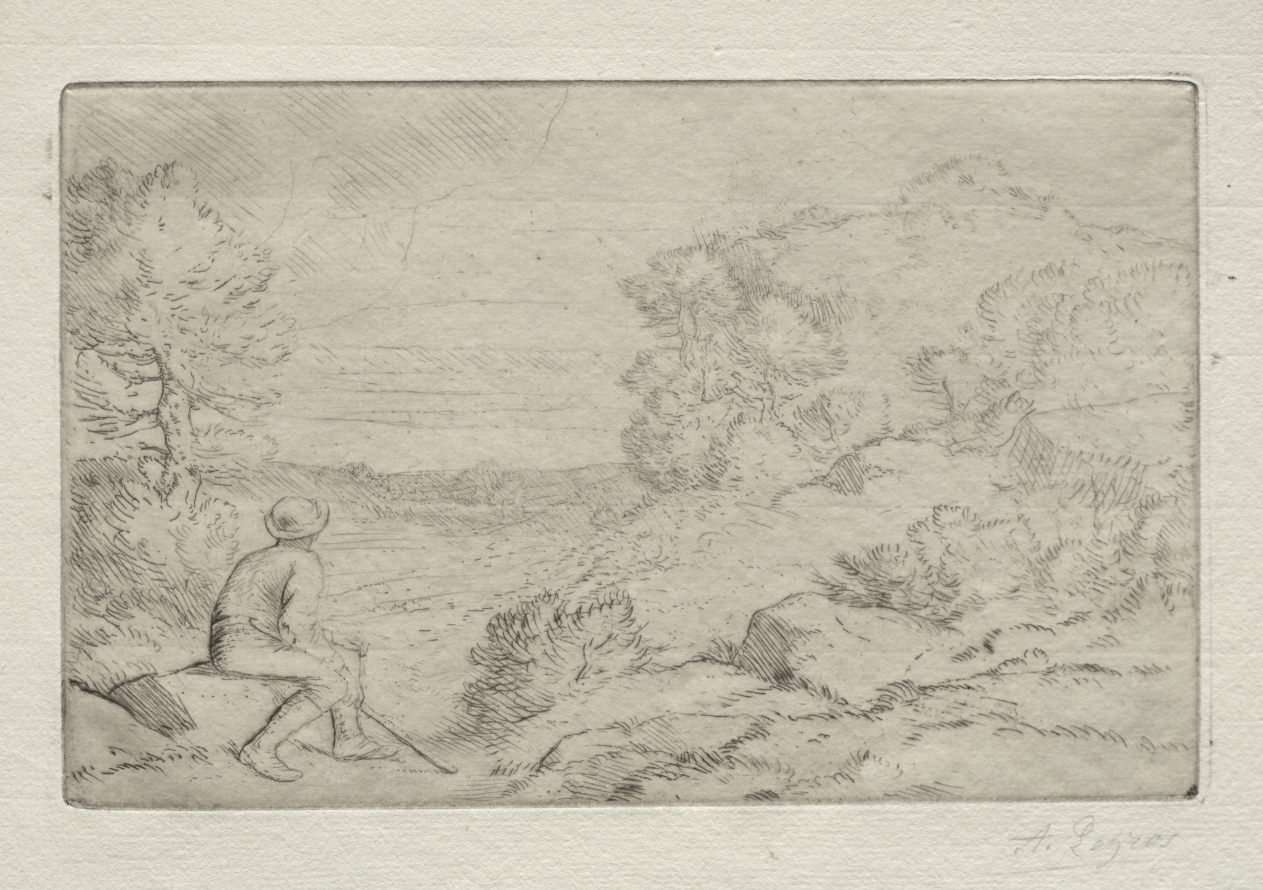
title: The Rocks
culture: France, 19th-20th century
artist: Alphonse Legros (French, 1837–1911)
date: c. 1857–1911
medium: etching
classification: Print